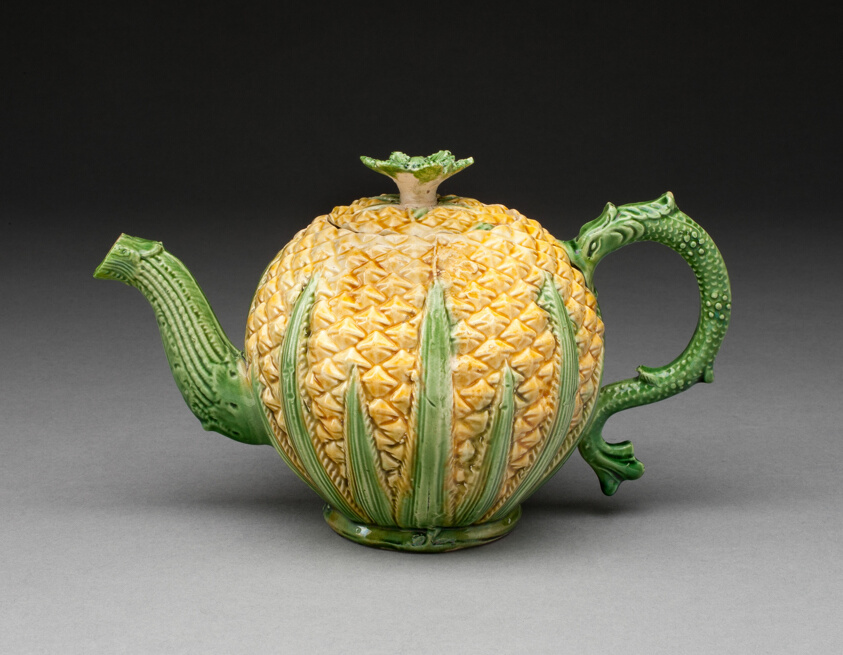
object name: Ceramics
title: Teapot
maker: Staffordshire, England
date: 1750–70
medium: Lead-glazed earthenware (creamware)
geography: Staffordshire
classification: teapot; ceramics; creamware; earthenware; european decorative arts; lead-glazed earthenware